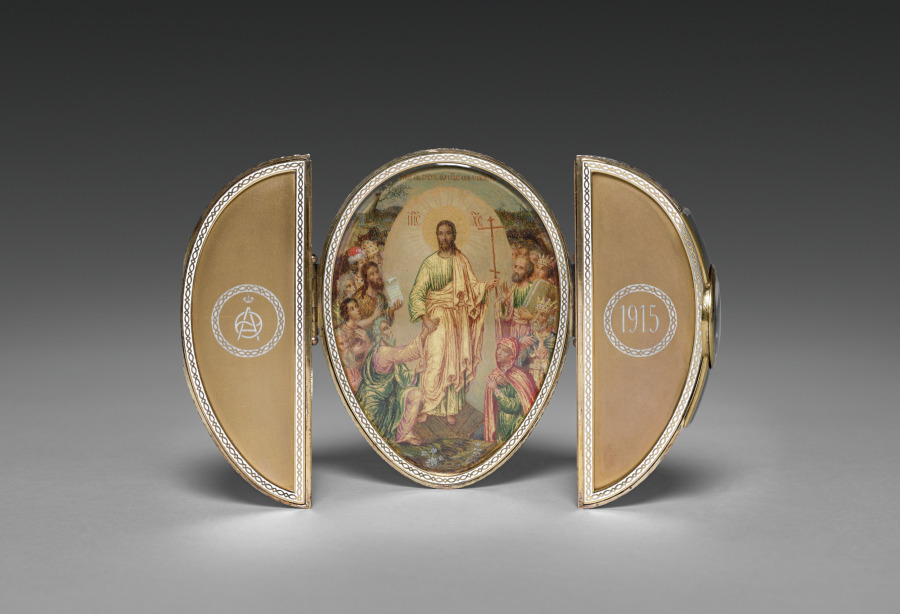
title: Imperial Red Cross Easter Egg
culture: Russia, St. Petersburg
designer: Peter Carl Fabergé (Russian, 1846–1920)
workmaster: Henrik Wigström (Russian, 1862–1923)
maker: House of Fabergé (Russian, 1842–1918)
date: 1915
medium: gold, silver gilt, enamel, glass, ivory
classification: Miscellaneous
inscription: inscribed on interior of egg: symbols for Alpha and Omega and imperial crown for Alexandra Feodorovna; 1915; inscriptions in Cyrillic, Old Church Slavonic, and Roman letters which identify Sts. Olga and Tatiana and presumably describe the central scene of the triptych.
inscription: Inscribed on silk velvet and satin lined case: double-headed eagle, Fabergé, Petersburg, Moscow, London (all in Cyrillic on lining of case); 17.559, abbreviation for "Red Cross" (in Cyrillic in red ink on outside of case).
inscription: Hallmarks: 72, Kokoshnik, lower case alpha in script [assay mark of St. Petersburg, 1908-26]; H.W. [initials of workmaster Henrik Wigström]; Fabergé (in Cyrillic).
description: The House of Fabergé made two imperial Easter eggs in 1915 that honored the contributions of Tsarina Alexandra and her two eldest daughters, Olga and Tatiana, to the war effort as Red Cross Sisters of Mercy. Compared to other Fabergé eggs elaborately ornamented with jewels, the eggs reflected the mood of austerity in Russia during World War I. This version becomes an icon when opened, revealing miniatures of the patron saints of the tsarina’s daughters. After the Russian Revolution, this relic of the Tsarist past was sold by the Soviet government to raise needed cash for the treasury.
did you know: This egg was confiscated by the Bolsheviks during the Russian Revolution and sold by the government of Josef Stalin in the 1930s to raise money for the Soviet treasury.